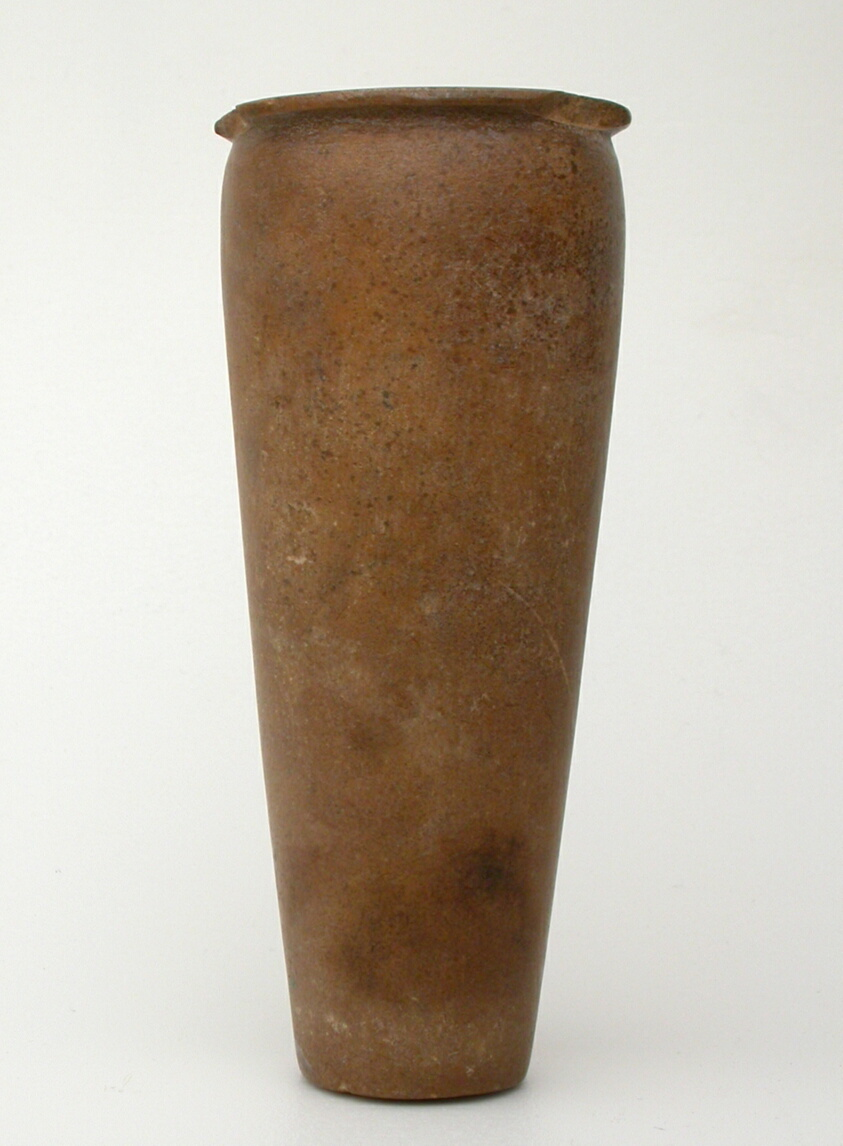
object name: Vessel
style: egyptian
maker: Egyptian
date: Old Kingdom (?), Dynasties 3–8 (about 2686–2160 BCE)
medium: Stone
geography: Egypt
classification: vessel; stone; ancient art